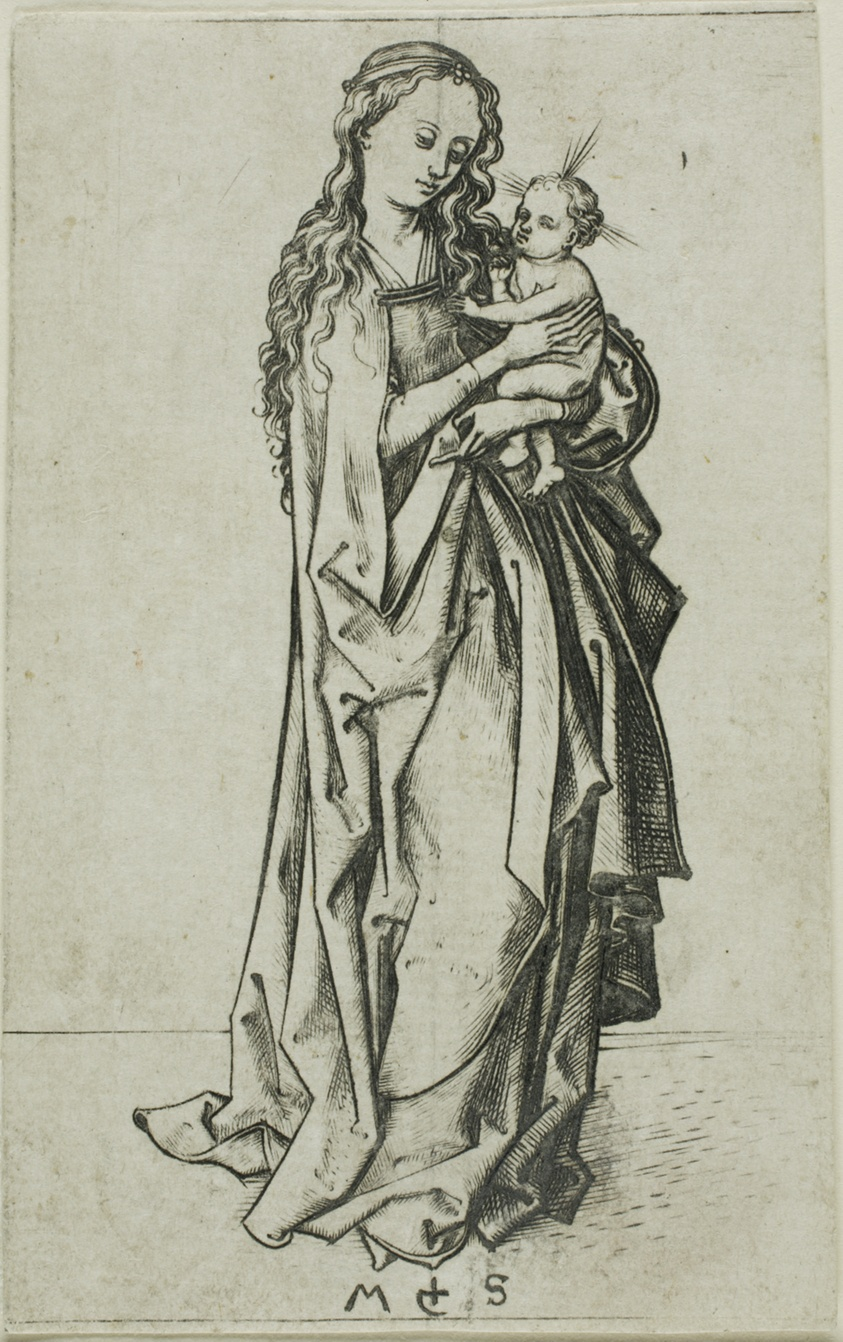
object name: Print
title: Small Standing Madonna and Child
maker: Martin Schongauer (German, c. 1430/50-1491)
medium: Engraving on paper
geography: Germany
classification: engraving; print; prints and drawing